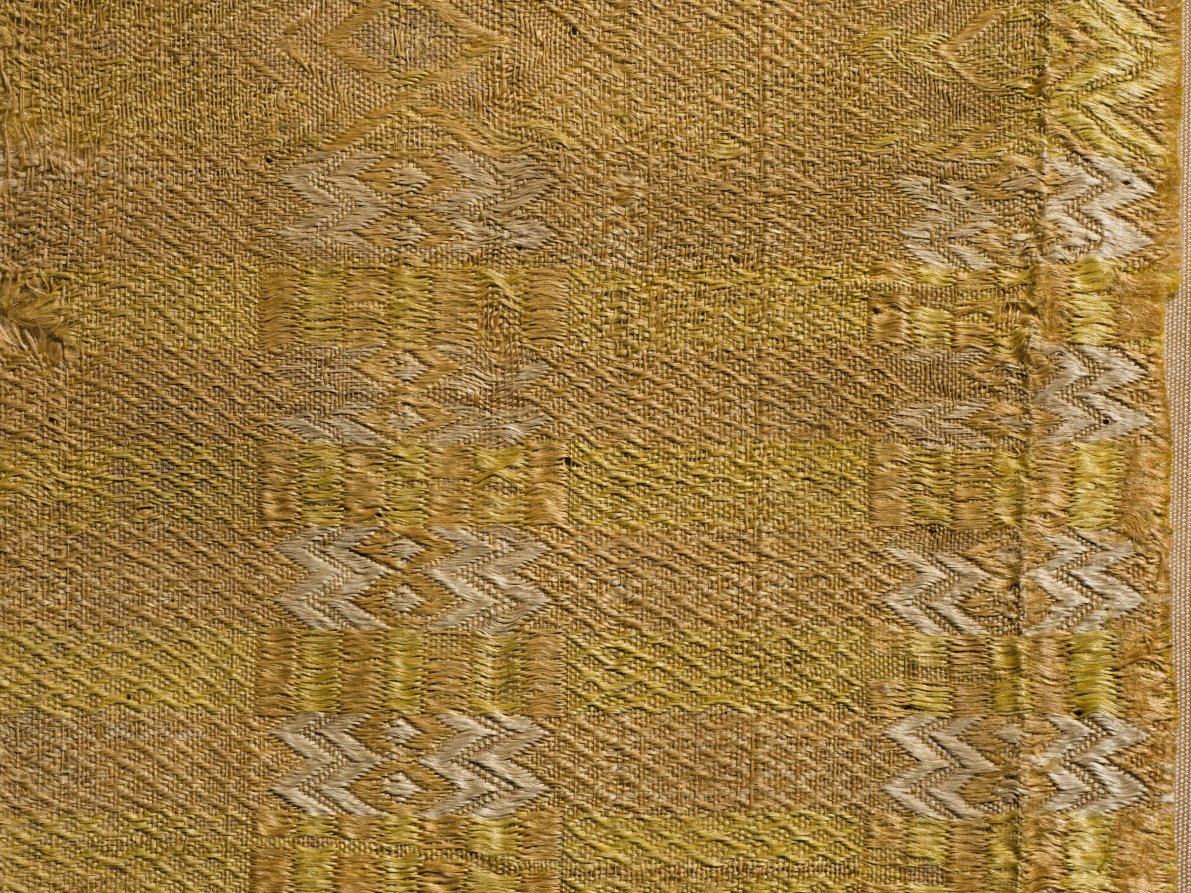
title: Silk Fragment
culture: Spain, Mudejar, 13th century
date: 1200s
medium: tabby weave: silk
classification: Textile